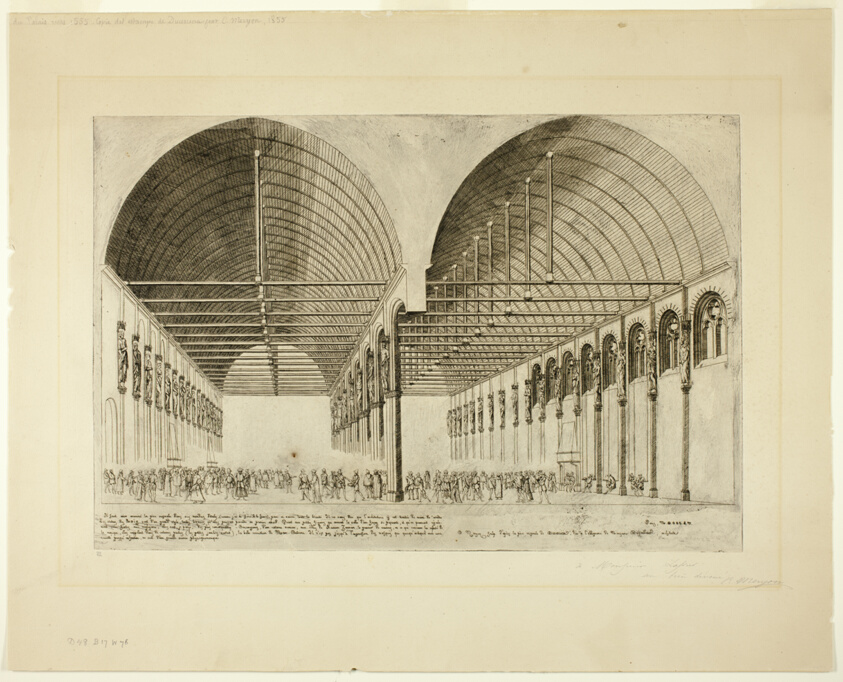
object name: Print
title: The Antechamber of the Palais de Justice, Paris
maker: Charles Meryon (French, 1821-1868); after Jacques Androuet du Cerceau, the Elder (French, c. 1515-1585); printed by Auguste Delâtre (French, 1822-1907)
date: 1855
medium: Etching, from a pewter plate, with foul-biting, burnishing and scraping on cream wove paper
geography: France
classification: etching; print; prints and drawing